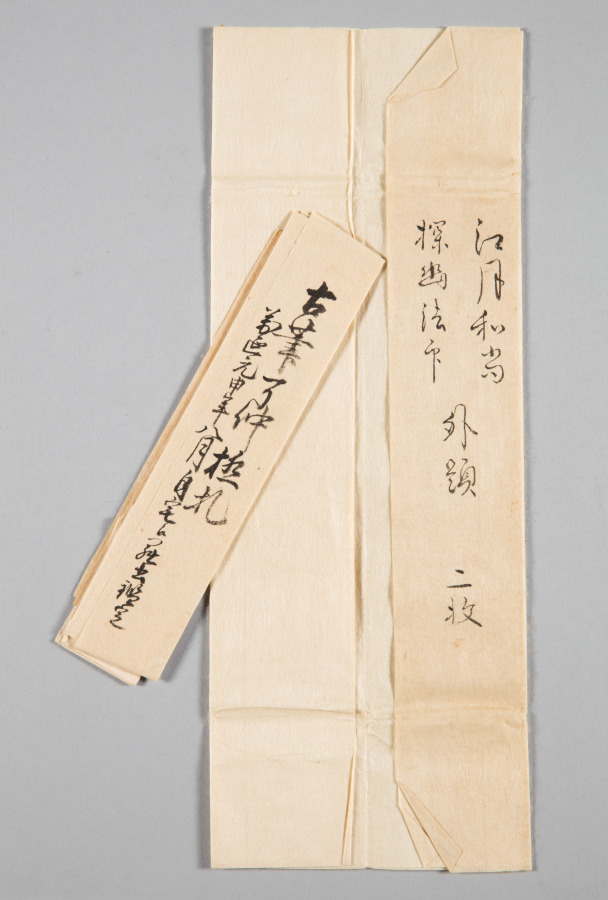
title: Reeds and Geese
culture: Japan, Kamakura period (1185–1333)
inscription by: Yishan Yining [Issan Ichinei] (Chinese, 1247–1317)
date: 1314–17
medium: hanging scroll; ink on paper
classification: Painting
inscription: signed: Issan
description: Reeds and geese has been a common pairing in Chinese literary and visual culture for many centuries. This painting presents the contribution of a Japanese amateur painter, almost certainly a Zen Buddhist monk, to Japan’s fledgling efforts to add the theme to its own cultural vocabulary in the early 1300s. As was customary at the time in Japan, the painter did not sign or seal his work; the inscription, a poem added to the painting by the eminent émigré monk Yishan Yining, along with his signature and seal, was of far greater cultural value. Today, the modestly sized painting has tremendous significance as one of the earliest surviving examples of Japanese ink paintings with reeds and geese.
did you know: Tokyo National Museum owns a copy of this painting made by Kano Gyokusen (1796–1864) when he was 14 years old.